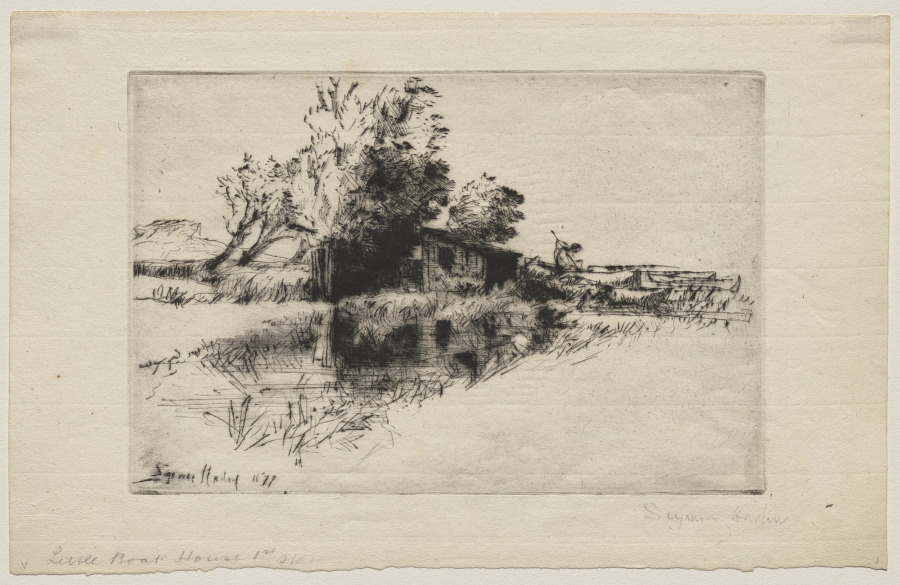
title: The Little Boathouse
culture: England, 19th century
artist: Francis Seymour Haden (British, 1818–1910)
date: 1877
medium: etching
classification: Print